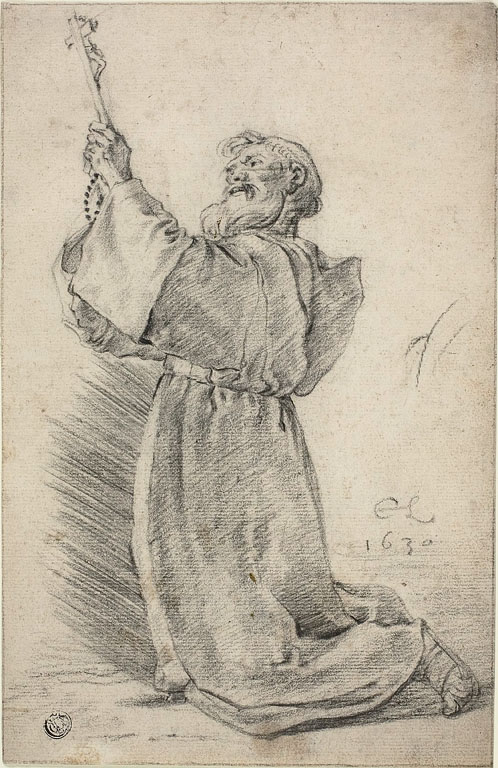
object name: Drawing and Watercolor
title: Kneeling Monk Holding a Crucifix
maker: Cornelis Saftleven (Dutch, 1607-1681)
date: 1630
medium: Black chalk on cream laid paper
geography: Holland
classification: chalk; drawings (visual works); prints and drawing